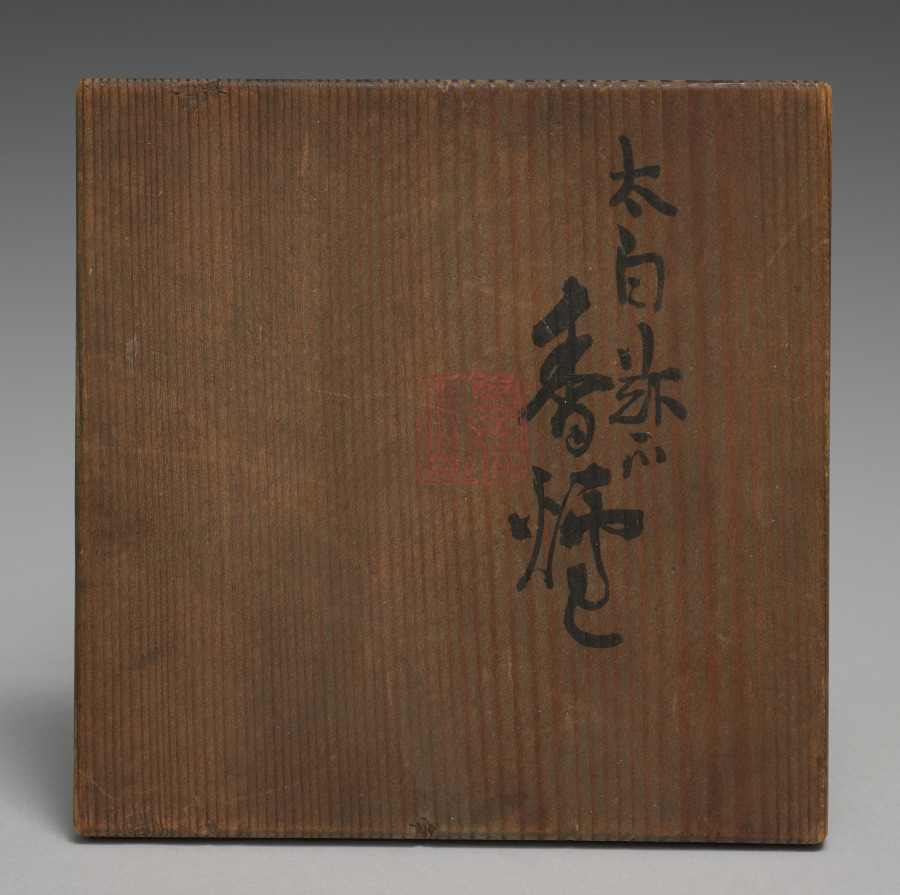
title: Incense Burner with Flowers and Dots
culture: Japan, Meiji period (1868–1912)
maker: Seifū Yohei III (Japanese, 1851–1914)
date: 1893–1914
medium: Porcelain with creamy white translucent glaze and molded and incised design with openwork silver lid in shape of flower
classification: Ceramic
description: Yohei III made incense burners in a wide variety of designs and styles. The body and glaze of this one are taihakuji, or “great white porcelain,” an important early invention Yohei III devised in 1872 that involved the combination of a distinctive translucent, creamy glaze over an ivory-colored clay body. The silver lid is meant to look like a single flower. The vessel has tapering legs with a combined curvilinear and geometric design; the bands encircling the middle have simple, incised flower motifs alternating with single dots.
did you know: This incense burner has floral motifs on both the lid and the burner.